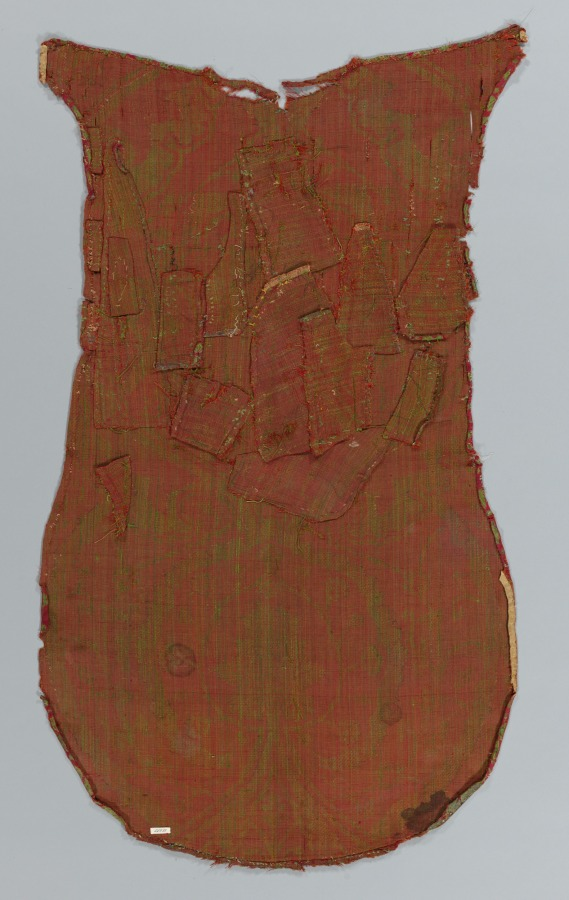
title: Chasuble Front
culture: Turkey, 16th century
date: 16th century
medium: velvet; silk and metallic thread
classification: Velvet